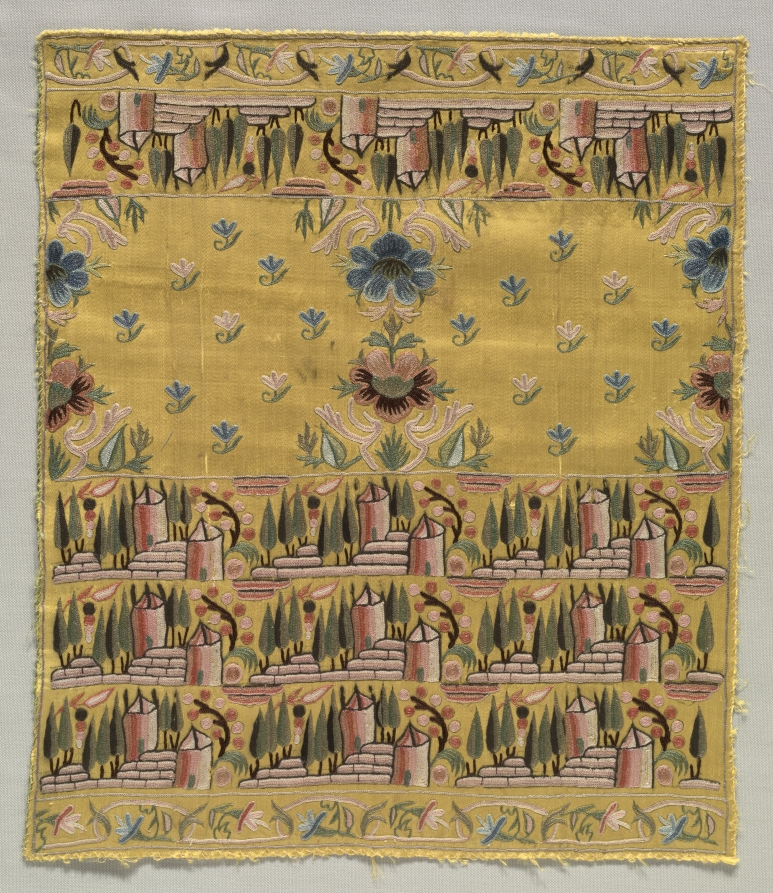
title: Embroidered Square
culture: Turkey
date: 1700s–1800s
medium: Silk thread on silk ground; embroidery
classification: Embroidery